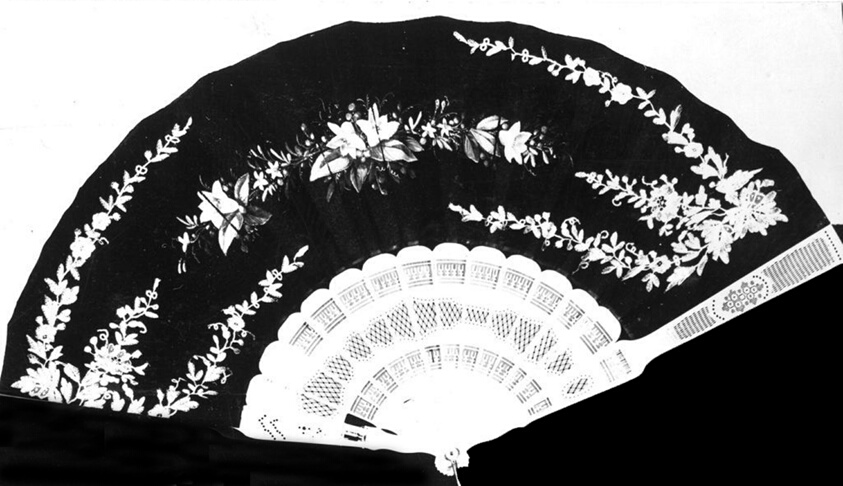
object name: Costume and Accessories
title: Fan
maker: France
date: c. 1870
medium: Carved and pierced bone sticks with black satin mount; painted with floral decoration and decorated with applied Brussels lace motif; pearl rivet, black gilt tassel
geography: France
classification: textile; fan - weaving; costume accessory - folding fan; costume accessory; costume